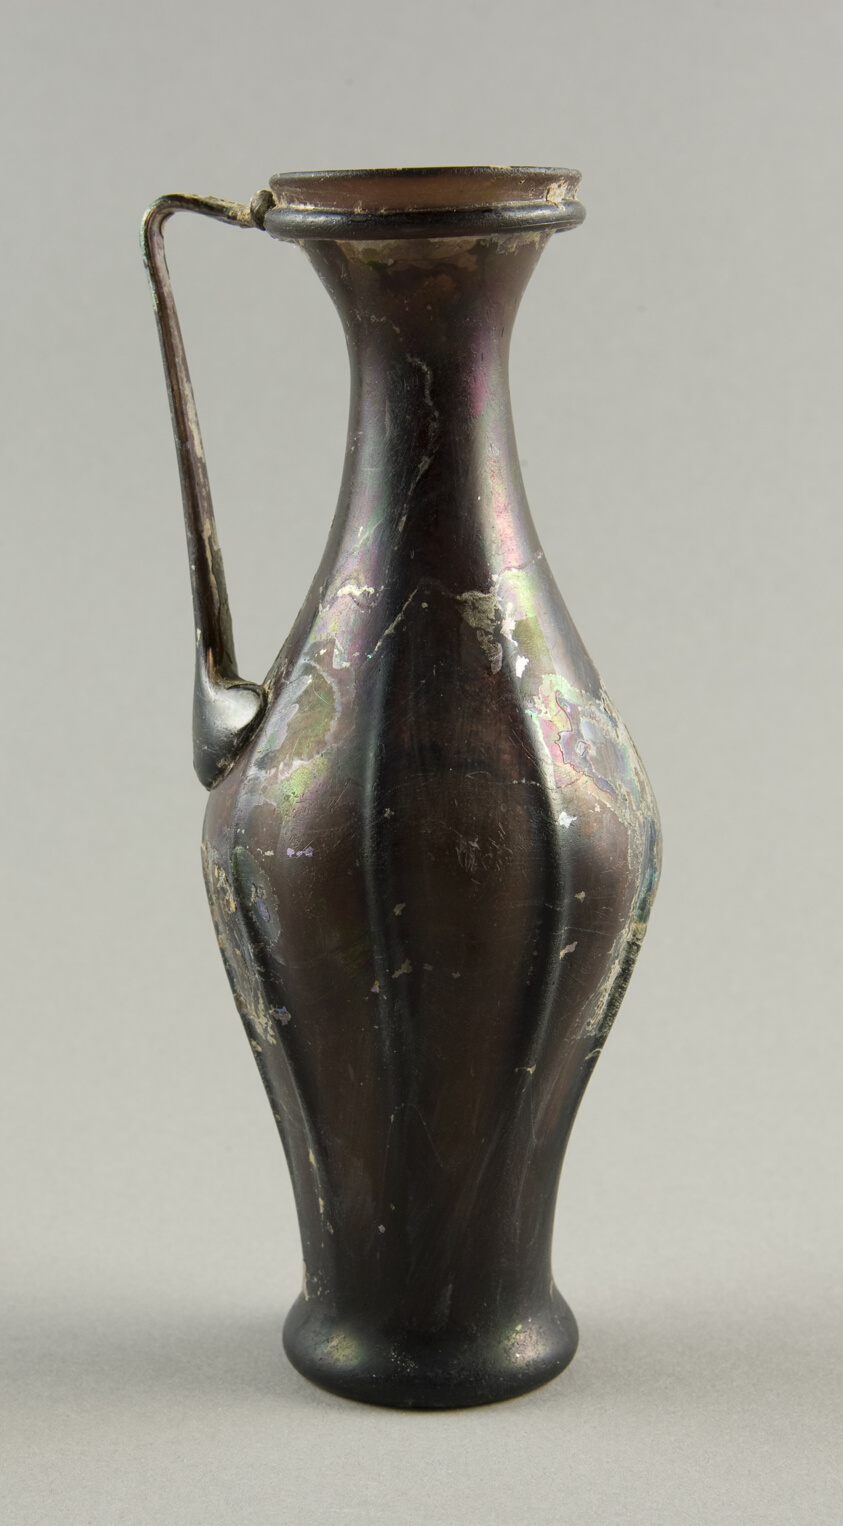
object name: Vessel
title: Pitcher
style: syrian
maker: Roman; Eastern Mediterranean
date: 2nd-3rd century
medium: Glass, blown technique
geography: Syria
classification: glass; vessel; ancient art